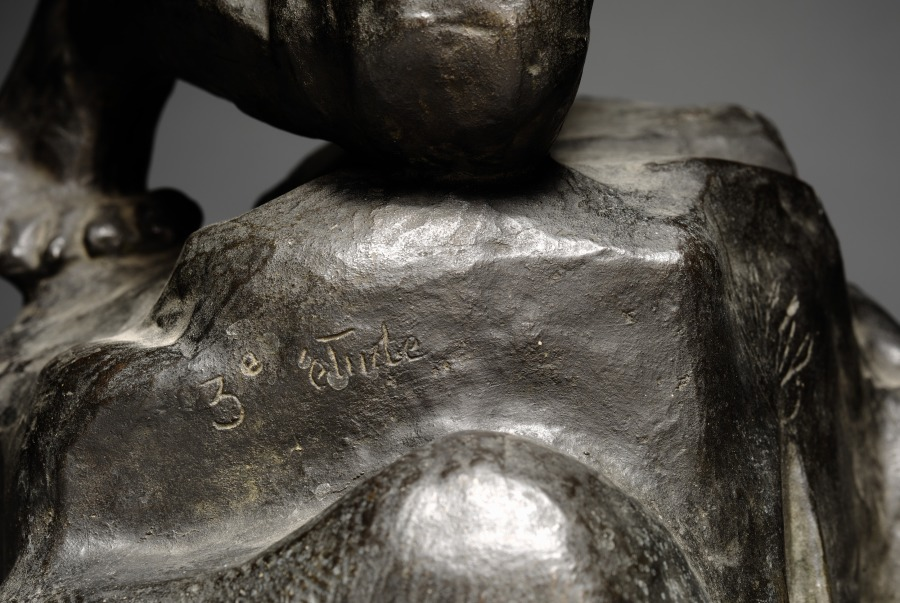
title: Herakles the Archer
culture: France, 19th century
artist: Emile Antoine Bourdelle (French, 1861–1929)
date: 1908–9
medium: bronze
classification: Sculpture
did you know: The model who posed for this sculpture was Major Paul Gustave André Doyen-Parigot, an accomplished sportsman and military commander, who was later killed during World War I in the Battle of Verdun.